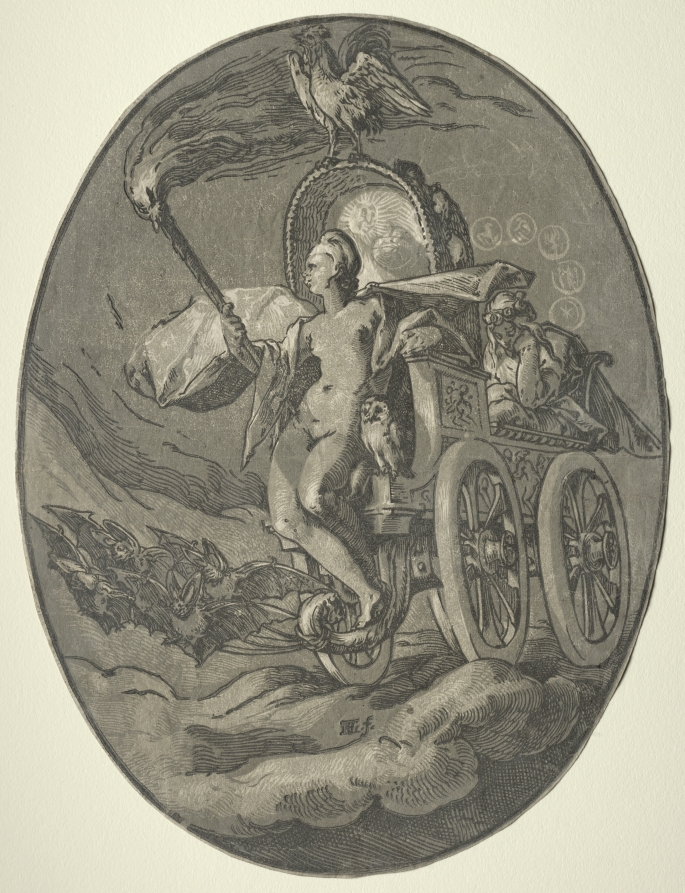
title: Seven Deities: Nox (Night)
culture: Netherlands, 16th century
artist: Hendrick Goltzius (Dutch, 1558–1617)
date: 1588–1590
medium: chiaroscuro woodcut (in gray and black)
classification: Print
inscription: lower center, in block: HG.[in monogram] f. ; VERSO, upper center, in pen and black ink: 1n6? ; upper right, in graphite: [illegible] ; lower left, in pen and blue and brown ink: # 1000 s?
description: Goltzius, famous as an engraver and painter, was the most important advocate of chiaroscuro woodcuts in the Netherlands. Nox is part of a group of seven oval portraits of gods and goddesses shown in their habitats. Accompanied by an owl and rooster, Nox rides in a chariot pulled by bats. Behind her, the sun shines on the orb of the earth and the personification of Sleep dozes contentedly. Because the earliest impressions of Nox, and other Goltzius chiaroscuros, were printed in muted shades like the grays of this impression, the artist may not have had a role in later editions, in which much brighter colors were used. Due to the popularity of these colorful prints, some of Goltzius's chiaroscuro woodcuts—as well as those by other artists like Albrecht Dürer—were reprinted by the Antwerp publisher Willem Jansz, later called Blaeu.